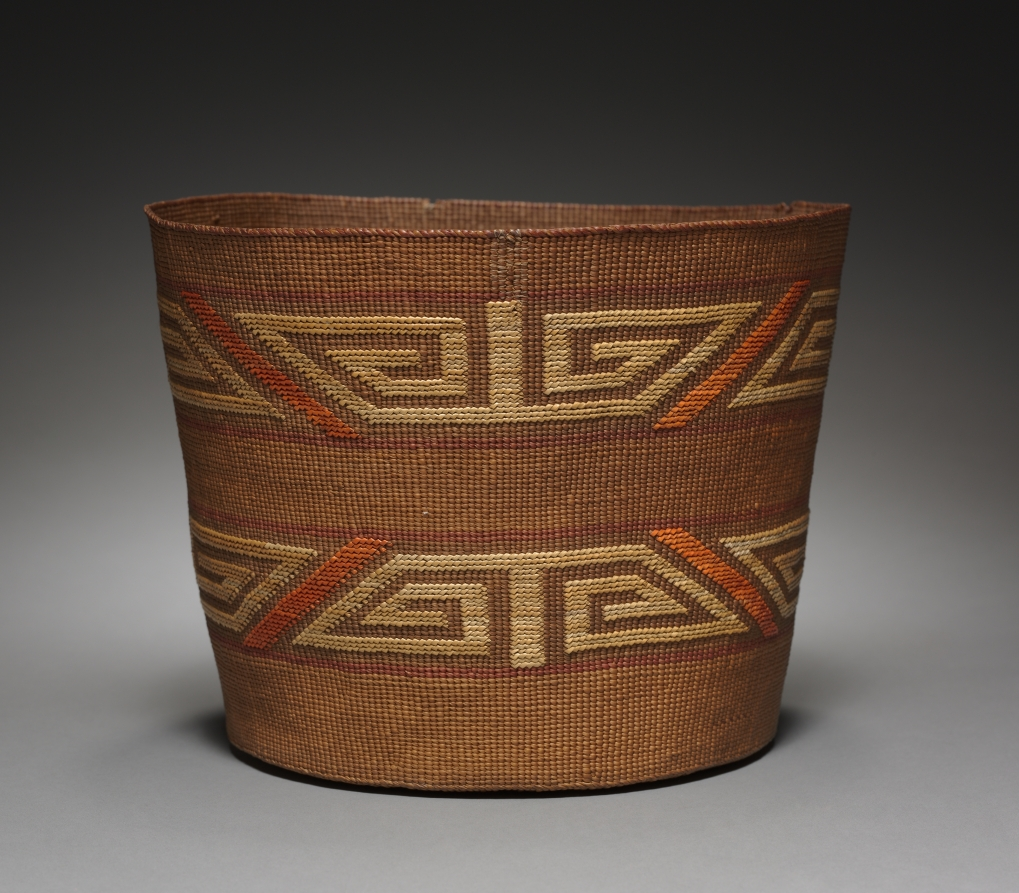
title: Bowl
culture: Northwest Coast, Tlingit, 20th century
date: before 1942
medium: twined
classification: Basketry